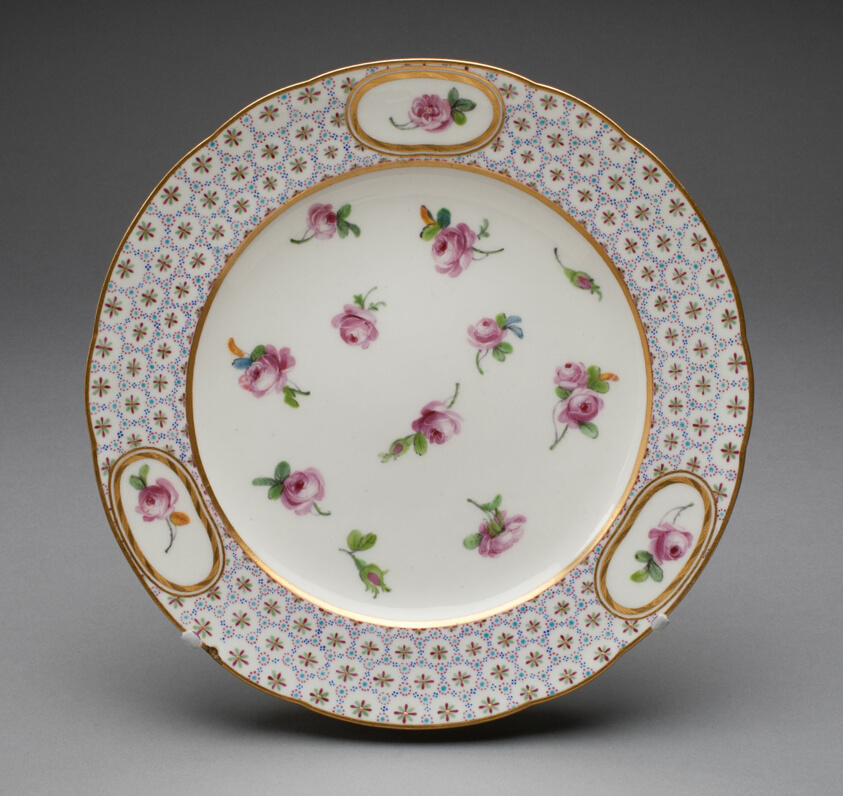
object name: Ceramics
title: Plate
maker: Sèvres Porcelain Manufactory; French, founded 1740; Painted by Bouillat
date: 1787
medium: Soft-paste porcelain, polychrome enamels, and gilding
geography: Sèvres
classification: plate (general, dish); tableware; dish (vessel); ceramics; porcelain; european decorative arts